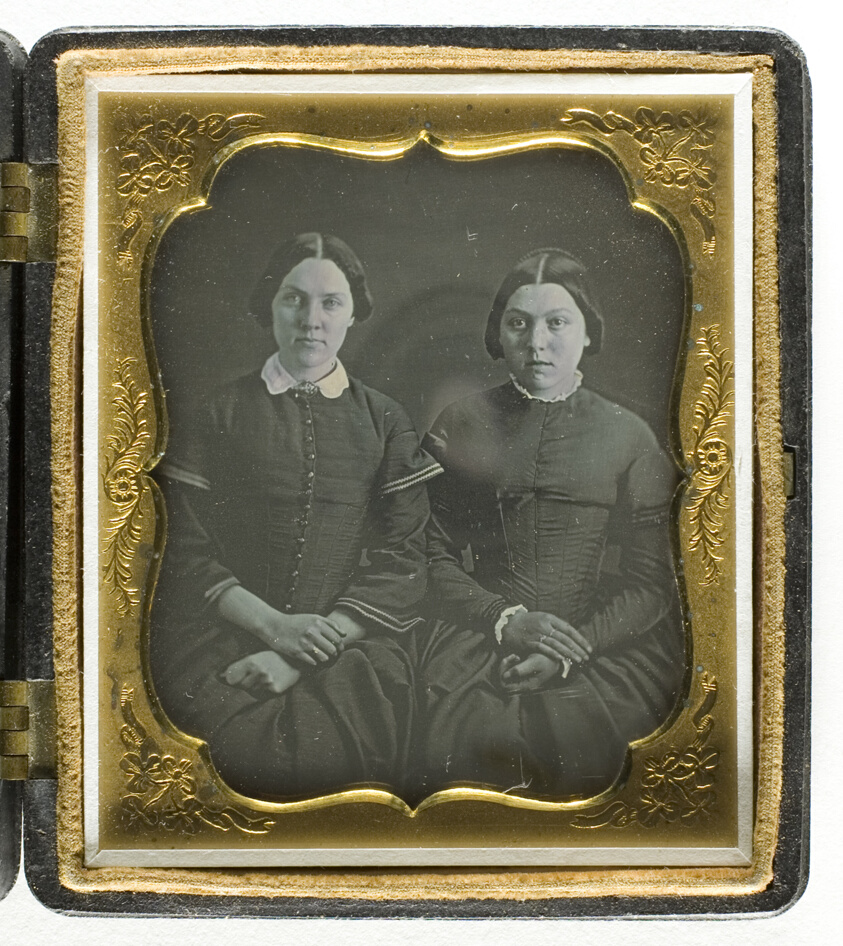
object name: Photograph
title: Untitled (Two Women)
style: 19th century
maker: Artist unknown; 19th century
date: 1839/60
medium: Daguerreotype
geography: Unknown Place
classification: daguerreotype; photographic process; photography; photograph